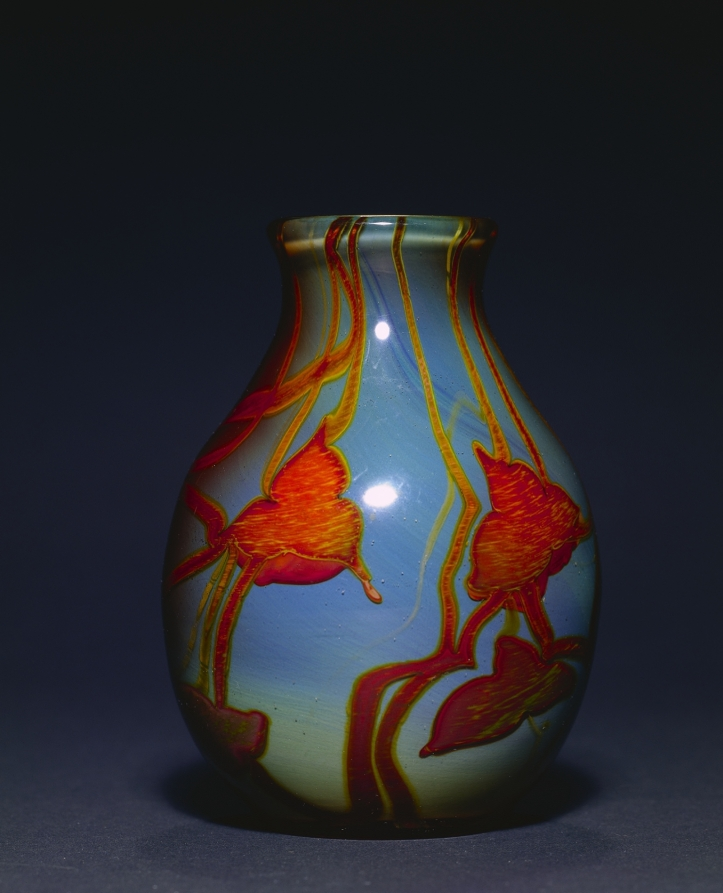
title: Vase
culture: America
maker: Tiffany Studios (United States, New York, 1902–32)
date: c. 1902–15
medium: favrile glass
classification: Glass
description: This small vase is made of Louis Comfort Tiffany's signature Favrile glass. Early on when Tiffany began collaborating with glass artists on new types of production, his aesthetic ambitions were realized in the development of Favrile glass, deliberately named to sound French, expensive, and “handmade.” Largely through Tiffany's marketing ability, Favrile glass became America’s greatest contribution to the Art Nouveau style. His works were exhibited at international expositions; galleries in major European cities, where his creations were bought by many museums; and in his store in Manhattan, known as the Tiffany Glass and Decorating Co., later Tiffany Studios. Along with the many shapes and sizes of his decorative vases, Tiffany used Favrile glass in mosaic panels, stained glass windows, and his artistic line of table and floor lamps.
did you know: Benjamin Hubbell, the architect of the Cleveland Museum of Art, acquired this vase from Louis Comfort Tiffany, with whom he collaborated on various projects.